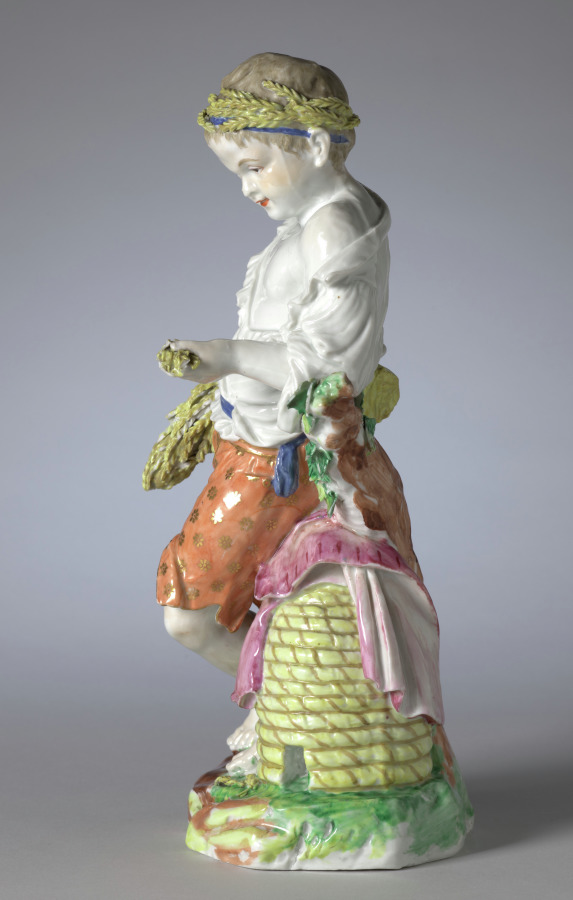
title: Figure of Summer from the Four Seasons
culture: England, Bristol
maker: Bristol Porcelain Factory (British, 1770–81)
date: c. 1775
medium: hard-paste porcelain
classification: Ceramic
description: The modern notion of childhood as a time of innocence and simplicity emerged during the second half of the eighteenth century. This understanding of adolescence led to numerous depictions of children as personifications of the four seasons. Here summer is portrayed as a young boy holding a sheaf of wheat as he leans against the beehive next to him. Both grain and honey have been associated with summer harvests and their accompanying festivals since antiquity.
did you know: Allegorical figures most often decorated a table during the dessert course, providing amusing subjects for conversation.